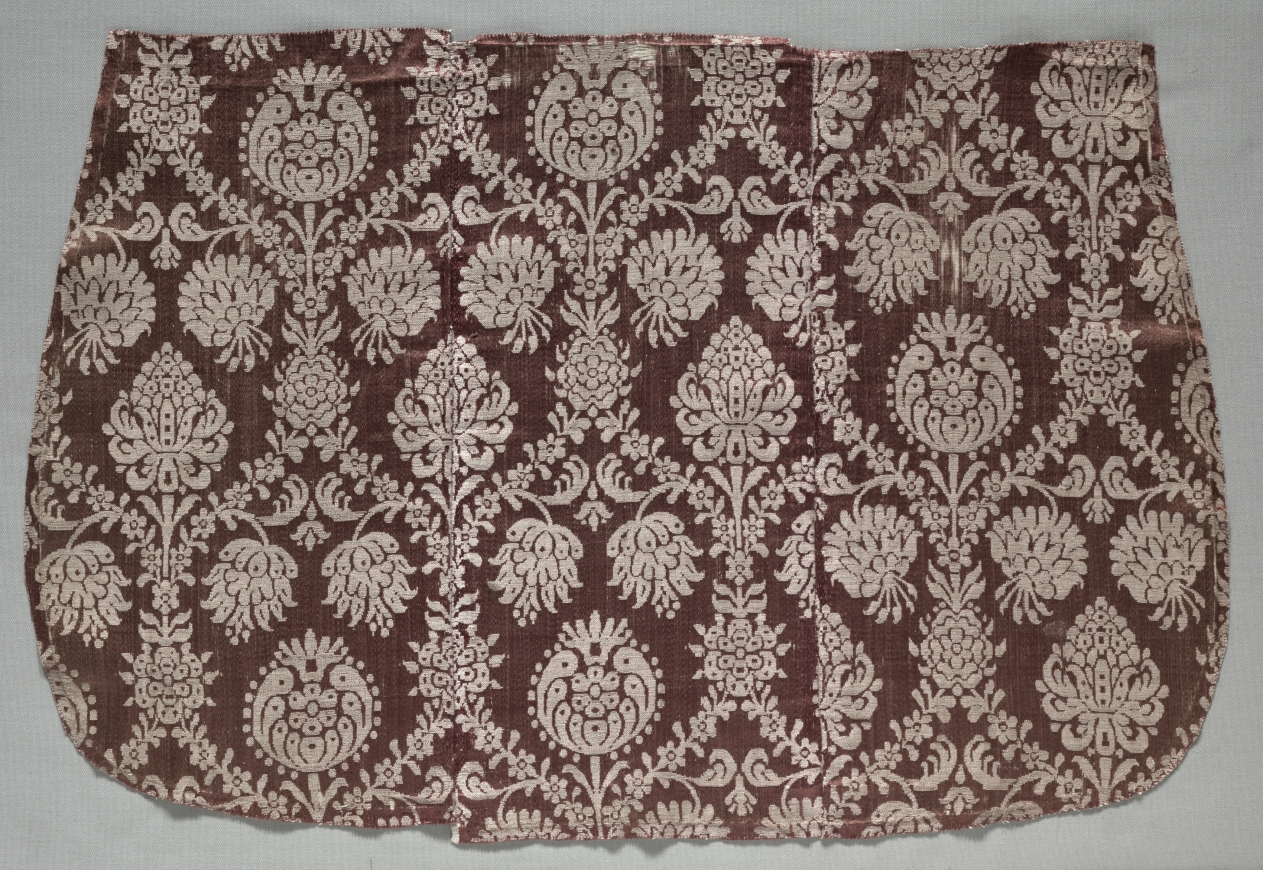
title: Fragment of a Chasuble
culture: Italy, 17th century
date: 1600s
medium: damask, silk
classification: Textile